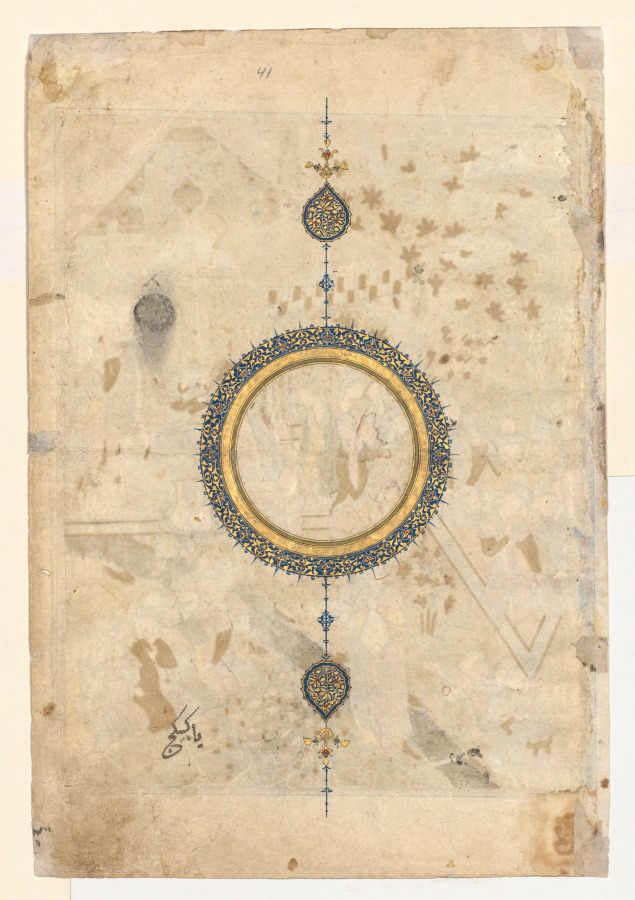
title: Royal Reception in a Landscape, right folio from a double-page frontispiece of a Shahnama (Book of Kings) of Firdausi (940–1019 or 1025)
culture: Iran, Shiraz, Timurid period (1370-1501)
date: 1444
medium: opaque watercolor, gold, and silver on paper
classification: Manuscript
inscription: Yā kabīkaj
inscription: Recto: Effaced seal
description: The painting on the verso of this folio is the first half of a double-page frontispiece now detached from a Shah-nama manuscript (see CMA 1956.10 for the second half of the frontispiece). The scene does not illustrate a narrative from the Shah-nama, but is likely a representation of the courtly audience for whose entertainment the manuscript was created. The date and style of the painting indicate that it was made during the reign of the Timurid dynasty in Shiraz, Iran.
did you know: Seemingly uninterested in the emissaries and gifts, a prince kneels with six royal women under an open tent and tries to coax one to have a drink.